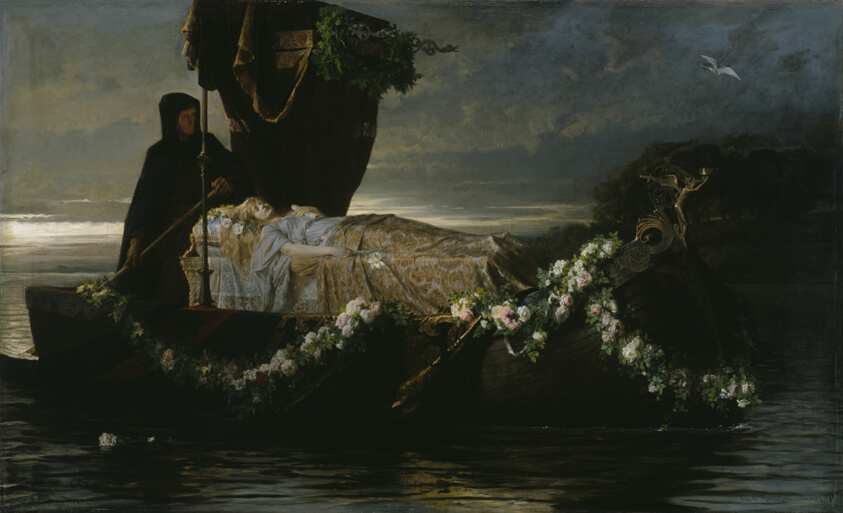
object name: Painting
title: Elaine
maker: Toby Edward Rosenthal (American, 1848–1917)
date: 1874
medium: Oil on canvas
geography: Munich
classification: painting; american arts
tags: mythology, people, portraits